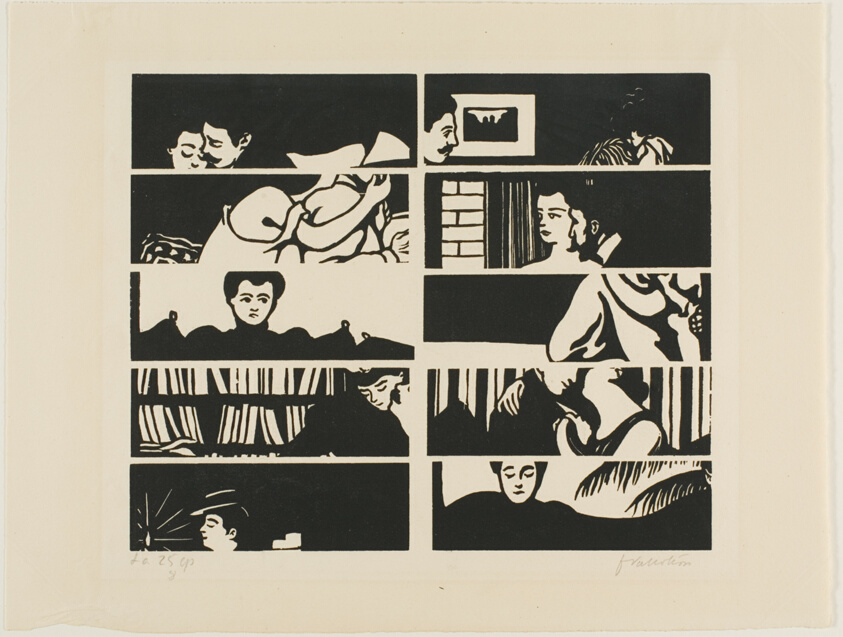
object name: Print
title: Cancellation sheet, fragments of ten woodblocks from Intimacies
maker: Félix Edouard Vallotton (French, born Switzerland, 1865-1925); published by La Revue blanche (French, 19th-20th century)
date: 1898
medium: Woodcut (ten separate blocks) in black on cream wove paper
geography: France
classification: woodcut; print; prints and drawing